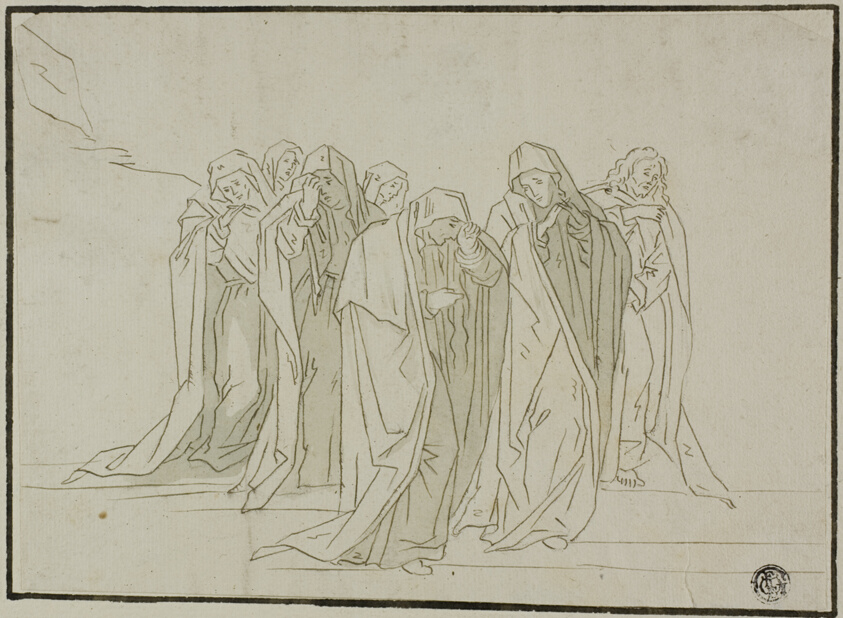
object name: Drawing and Watercolor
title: Mourning Figures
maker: Unknown Artist; European, n.d.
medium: Pen and brown ink, with brush and pale green wash, over black chalk, on ivory laid paper, tipped on ivory laid paper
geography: Europe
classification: pen and ink drawings; drawings (visual works); prints and drawing